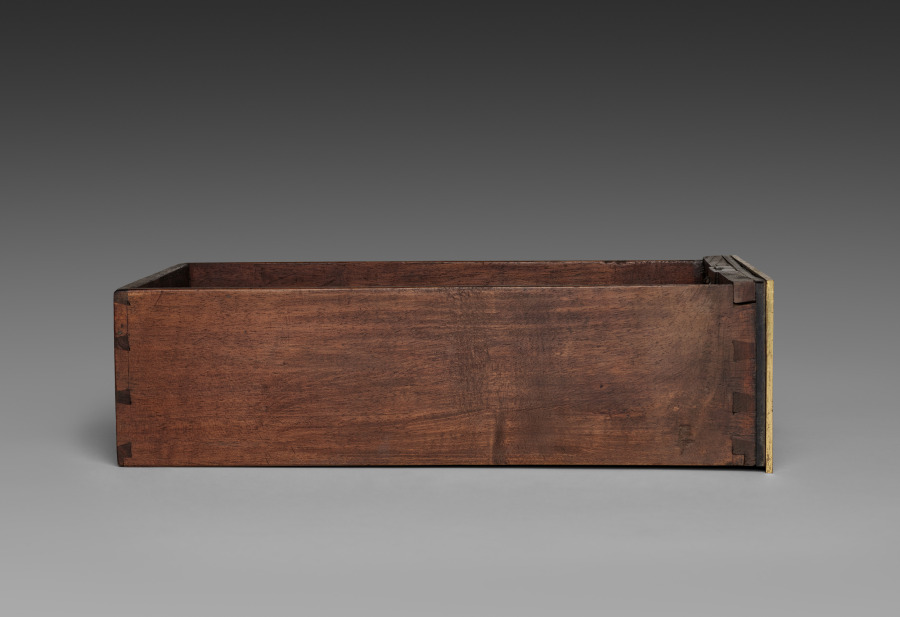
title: Side Drawer for Cabinet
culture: France, late 17th Century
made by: André-Charles Boulle (French, 1642–1732)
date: c. 1690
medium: ebony, marquetry in metal and tortoise shell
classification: Furniture and woodwork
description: Appointed cabinetmaker to King Louis XIV in 1672, André-Charles Boulle became a master of furniture making in France during the late 1600s until his death in 1732. Known primarily for his use of marquetry, in which metal patterns are inlaid into tortoiseshell then applied within the veneered surface of the furniture, Boulle established a level of quality and craftsmanship few others could achieve. As a result, his work found favor at the royal court and among other aristocrats and diplomats eager to impress the king. The inclusion of a medallion depicting Louis XIV within the bronze decoration of this chest would have identified the owner with the royal court. Often exhibiting stout architectural proportions with elegant groups of inlaid motifs such as the parrot on the central panel of this chest, Boulle’s designs are an example of the intellectual fashion for contrasting ideas, materials, and motifs.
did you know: Originally designed to sit atop an elaborate tall stand, this chest was likely altered in the late 1700s to reduce its scale and height.